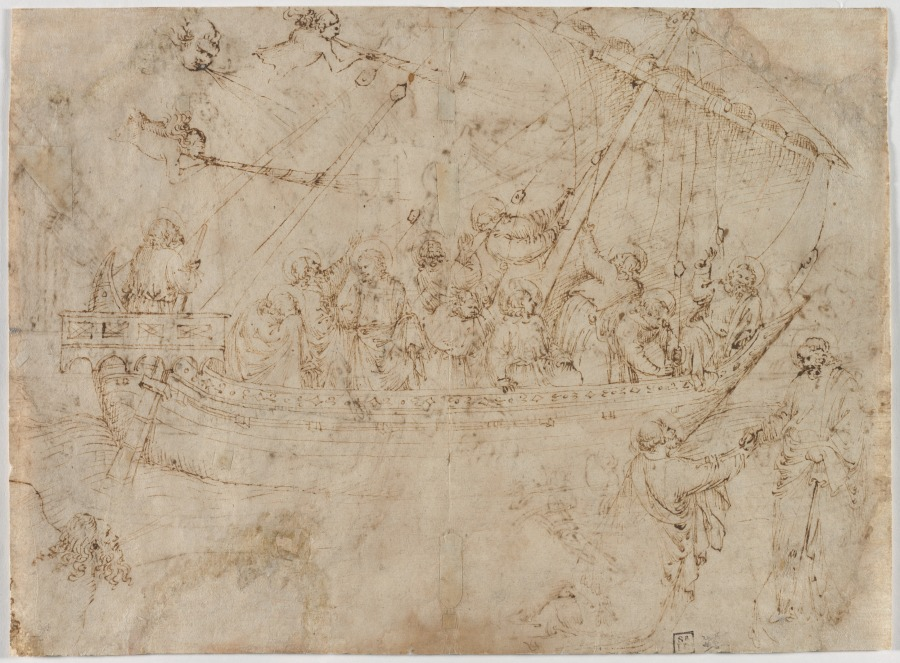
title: Navicella (recto); Two Drawings of Ships (verso)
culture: Italy, Arezzo, 15th century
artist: Parri Spinelli (Italian, 1387–c. 1453)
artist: after Giotto (Italian, 1266–1337)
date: c. 1410s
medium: pen and brown ink (iron gall)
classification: Drawing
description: Once attributed to the Italian painter Giotto (about 1267-1337), this drawing is the oldest sheet in the Cleveland museum's collection. We now know it to be a copy by Parri Spinelli after a mosaic Giotto designed for the portico of the church of Old St. Peter's in Rome.